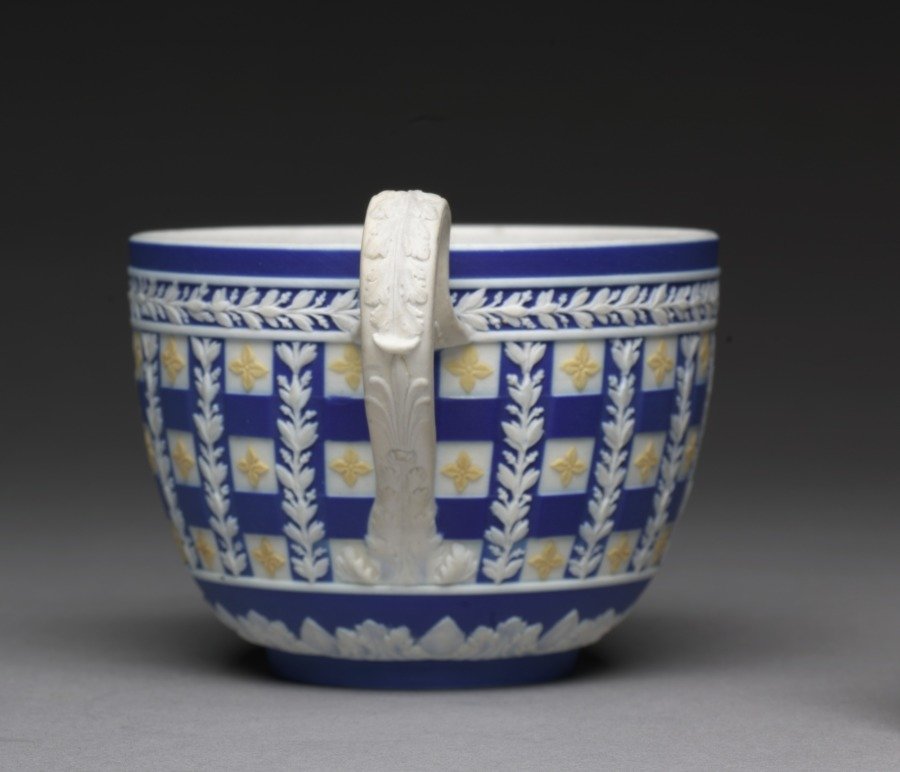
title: Saucer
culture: England, Staffordshire, 18th century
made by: Wedgwood Factory (British)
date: c. 1784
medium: jasper ware with relief decoration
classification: Ceramic